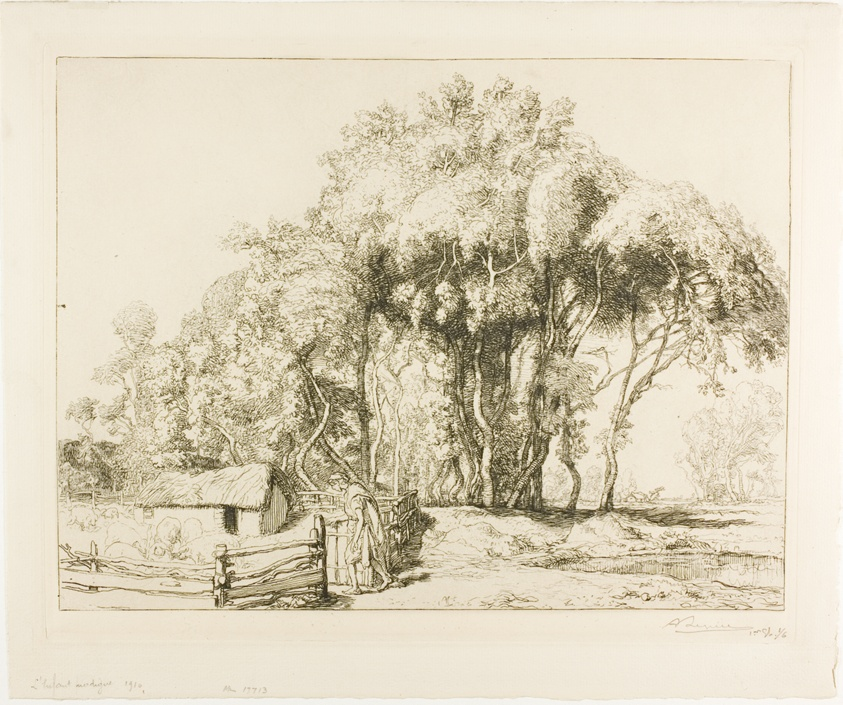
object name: Print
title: The Prodigal Son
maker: Louis Auguste Lepère (French, 1849-1918)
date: 1913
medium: Etching on cream laid paper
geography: France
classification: etching; print; prints and drawing